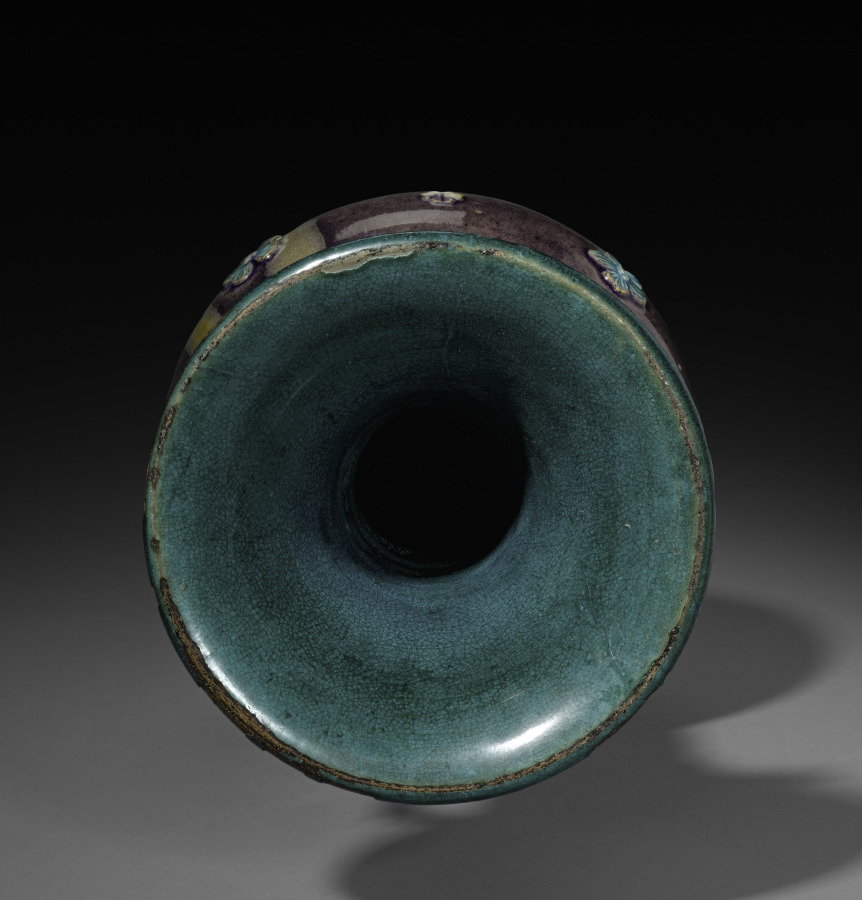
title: Vase with Branch of Plum Blossoms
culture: China, Shanxi province, Ming dynasty (1368-1644)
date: 1500s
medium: Glazed stoneware with molded and modeled decoration, Fahua ware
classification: Ceramic